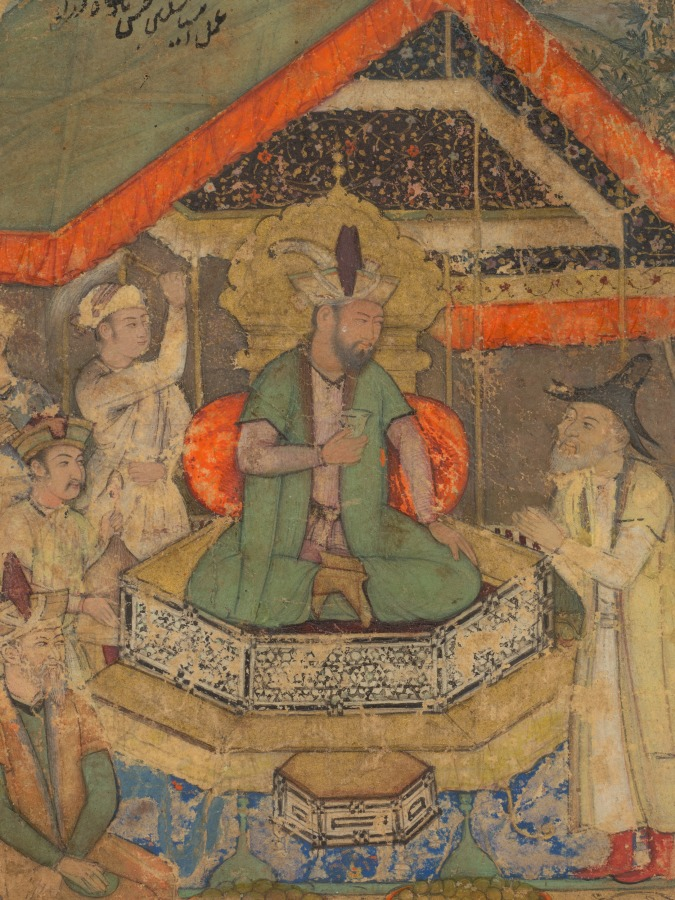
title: An Ambassador before Humayun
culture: Mughal India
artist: attributed to Miskin (Indian, active 1570s–c. 1604)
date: c. 1610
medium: Gum tempera and gold on paper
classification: Painting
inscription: Persian inscription at upper left probably added c. 1700s, in nasta‘liq script: the work of the master Miskin / Great King Hasan . . .]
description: Humayun, the second Mughal emperor of India, son of Babur and father of Akbar, is enthroned in an outdoor royal encampment. The scene recalls Humayun’s 15 years of exile between 1540 and 1555, many of which he spent traveling through Pakistan, Afghanistan, and Iran, after an Afghan rebel ousted him from India.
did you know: Humayun wore a special type of turban, his Taj-i Izzat (Crown of Power and Glory).